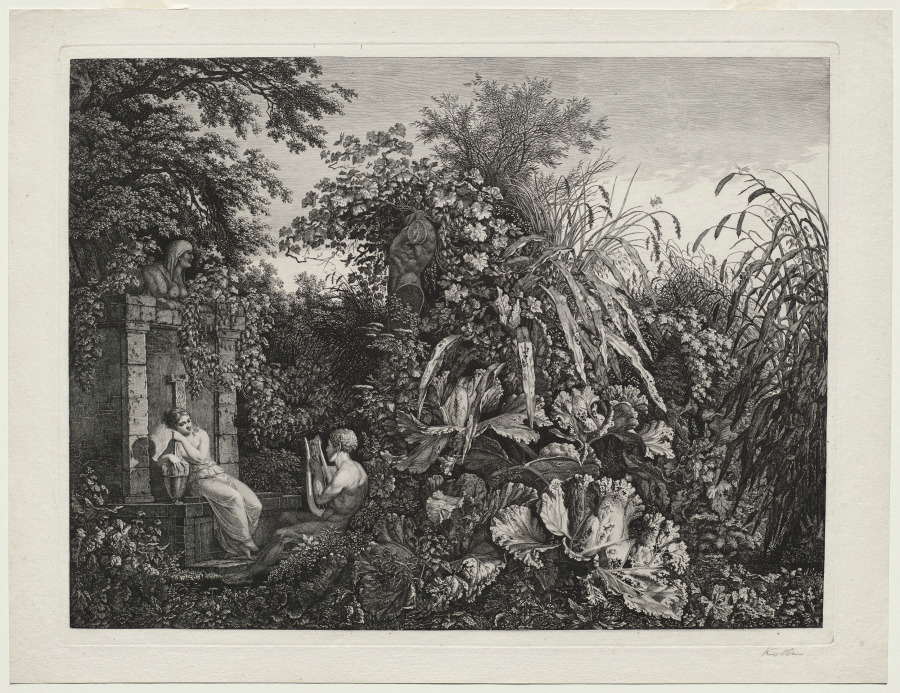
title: Youth Playing a Lyre to a Maiden by a Fountain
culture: Germany, 19th century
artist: Carl Wilhelm I Kolbe (German, 1757–1835)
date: 1803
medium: etching on heavy wove paper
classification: Print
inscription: Inscribed “Kolbe” in graphite, LR.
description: Youth Playing a Lyre to a Maiden by a Fountain features seated lovers singled out by the light that strikes their upper bodies, which counters the overwhelming scale of the fantastical growth of vegetation surrounding them. Carl Wilhelm Kolbe’s “vegetable sheets” broke new ground in Germany around 1800 by focusing on giant vegetation, allowing the viewer to experience the mysterious life in the undergrowth, a place untouched by humankind. Here, the vegetation is magnified, filling almost the entire sheet, and creating a distorted and somewhat surreal perspective combined with the meticulous observation of botanical details.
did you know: Carl Wilhelm Kolbe was nicknamed Eichenkolbem (Oak Kolbe) for his devotion to trees, which he credited with inspiring him to become an artist.